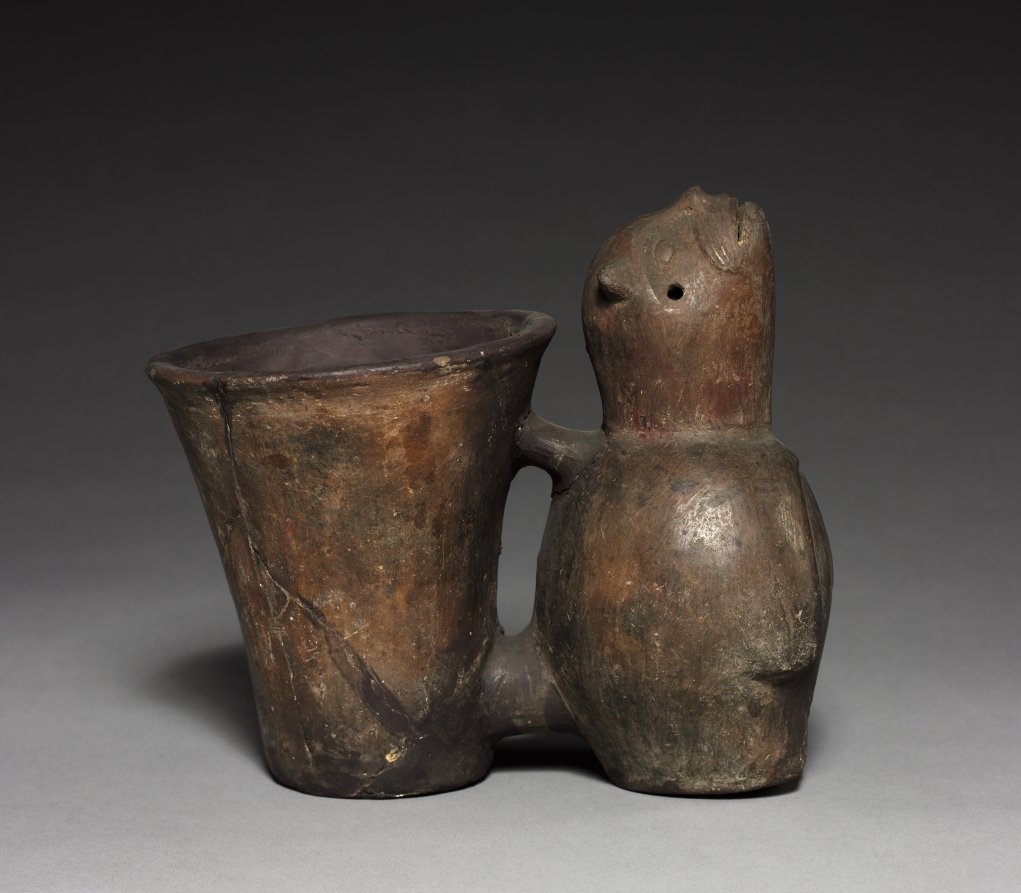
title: Vase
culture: Peru, Huacho Ware?, early 9th Century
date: c. 800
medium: black ware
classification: Ceramic